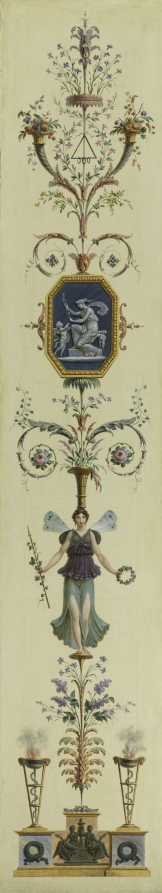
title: Decorative Panel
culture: France, 18th century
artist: Pierre Rousseau (French, 1751–1829)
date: 1790s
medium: oil on canvas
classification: Painting